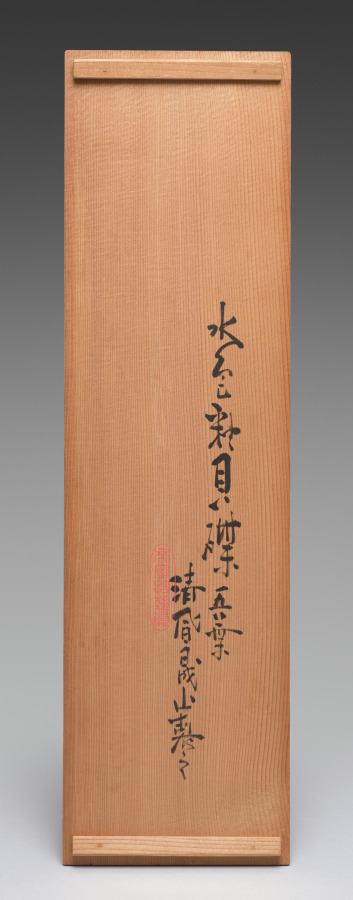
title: Saucers with Matching Shells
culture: Japan, Meiji period (1868–1912)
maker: Seifū Yohei III (Japanese, 1851–1914)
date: 1893–1914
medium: Set of five saucers; porcelain with molded designs and green crackled glaze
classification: Ceramic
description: Yohei III’s main output for his sophisticated clientele was in the form of tea sets and dining sets. He created a range of dishes in green glazes. He often produced in pairs, sets of five, or sets of ten. The set of five dishes with a more complex form is described as having a “water-colored glaze” (mizuiroyū). These are shaped like clam half shells, a reference to a game in which shell halves painted with narrative scenes or a variety of motifs must be matched back together by the players. The dishes have molded details to articulate the shell forms, and the crackling across each shell adds another dimension to the surface. Each dish is set on three small feet, formed by a pinched piece of clay and attached to an unglazed area on the underside of the dish. Curiously, while four of the dishes are stamped with the artist’s mark, one has instead a signature carved into the base.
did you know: The saucers are meant to look like matched halves of clam shells in reference to a once popular game.